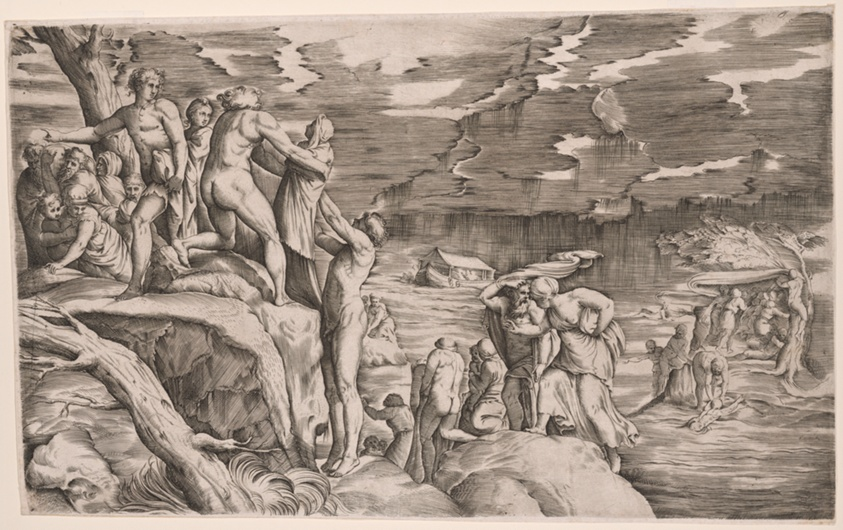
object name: Print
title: The Deluge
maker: Battista Franco (Italian, c. 1510-1561)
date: c. 1540s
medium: Engraving over etching in black on ivory laid paper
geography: Italy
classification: print; engraving; paper; prints and drawing